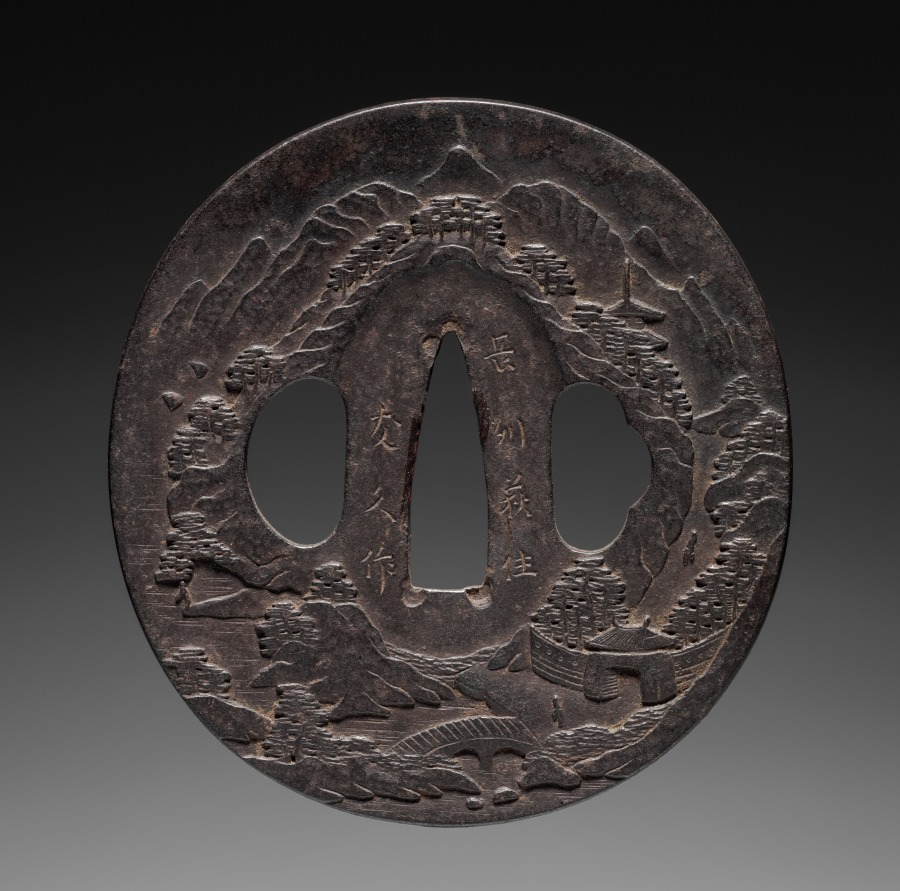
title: Sword Guard (Tsuba) with Chinese Landscape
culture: Japan, Edo period (1615–1868)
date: mid-1700s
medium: iron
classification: Arms and Armor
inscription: signed: 長州萩住友久作